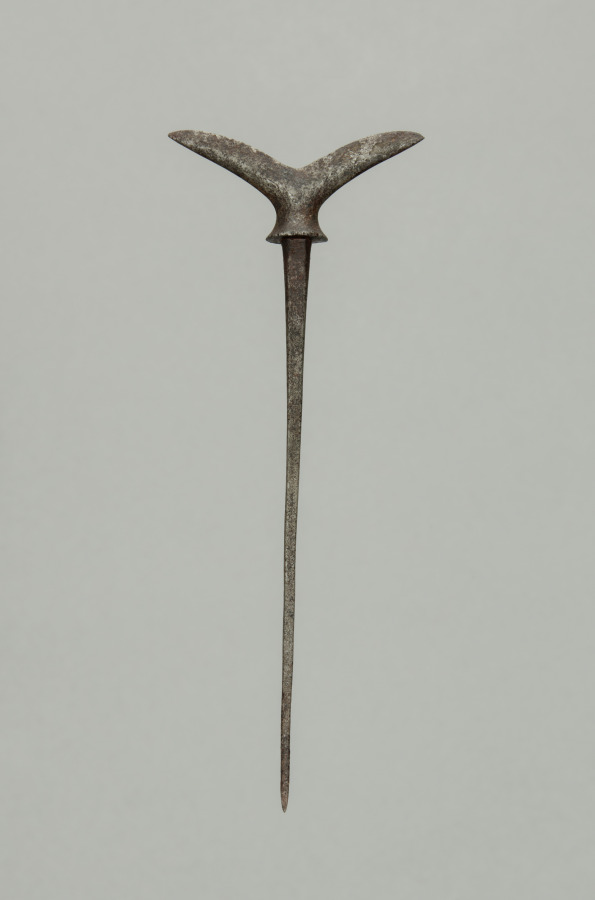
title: Arrow Point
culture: Japan, Edo period (1615–1868)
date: 1700s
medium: steel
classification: Arms and Armor